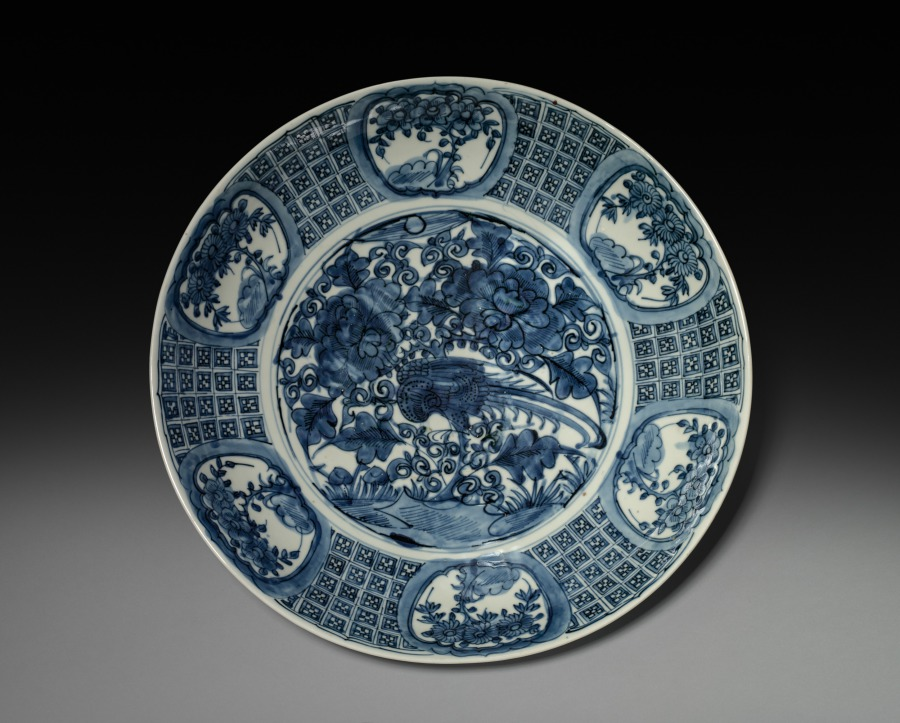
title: Plate with Phoenix and Peonies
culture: China, Southern Fujian province, Ming dynasty (1368-1644)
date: late 1500s–early 1600s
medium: Porcelain with underglaze blue, "Swatow" ware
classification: Ceramic